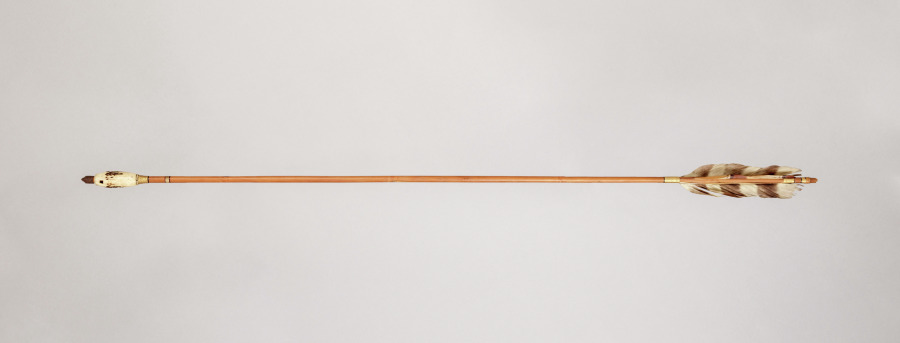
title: Arrow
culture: Japan, Edo period (1615–1868) to Meiji period (1868–1912)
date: 1800s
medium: bamboo shaft tipped with ivory point and heeled with pheasant feather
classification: Arms and Armor